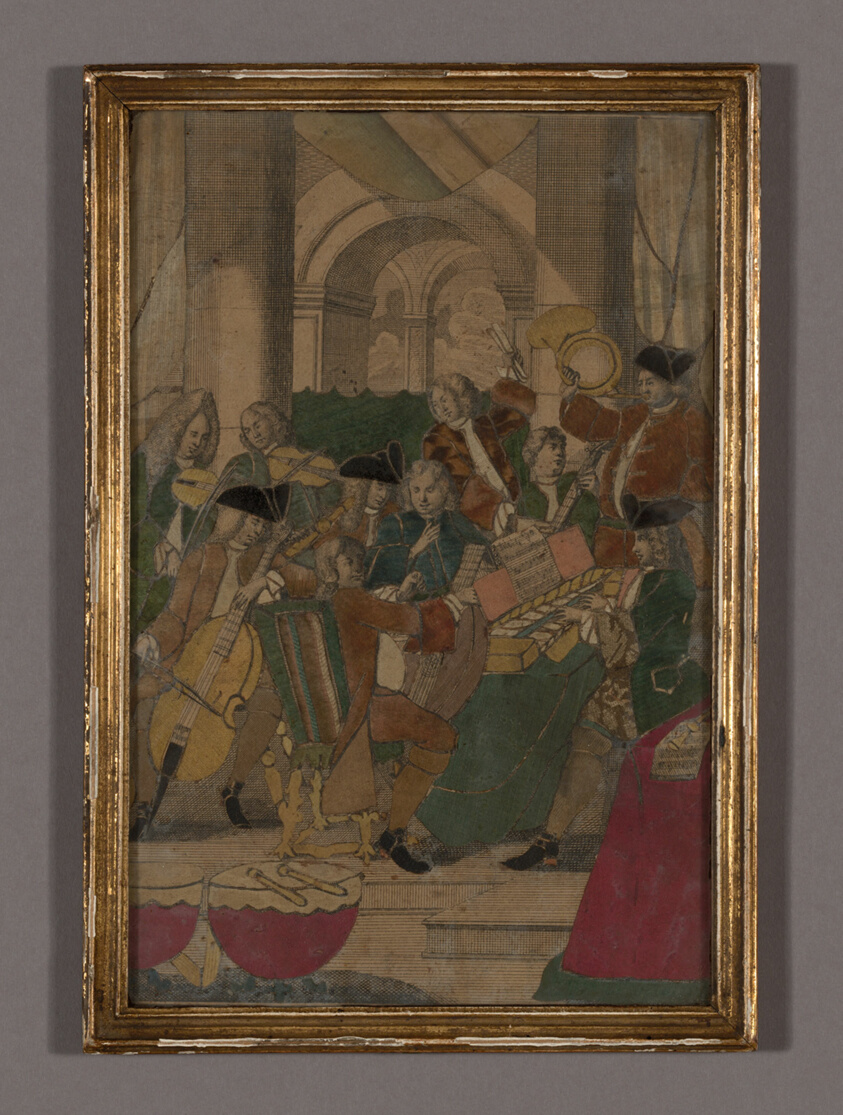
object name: Textile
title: Gravure découpé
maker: France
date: 18th century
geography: France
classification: textile; print; needlework (visual works)